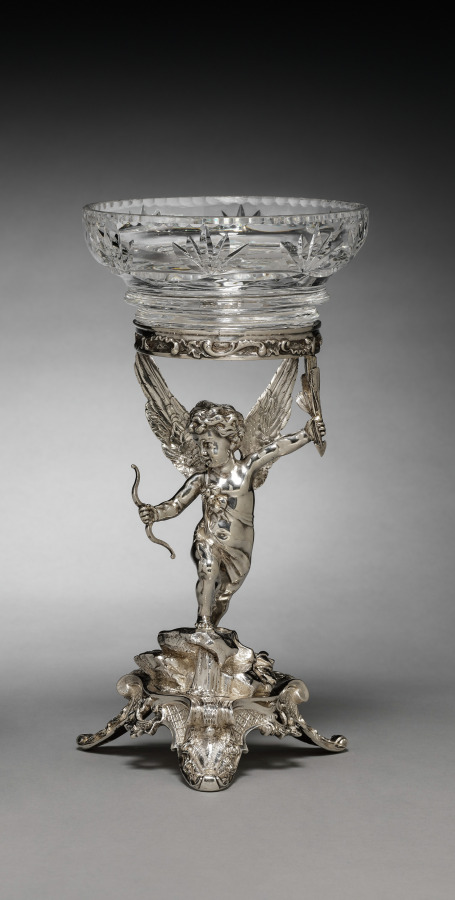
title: Compote and Stand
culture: Russian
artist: House of Fabergé (Russian, 1842–1918)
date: c. 1890–99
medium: silver, glass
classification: Silver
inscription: Inscribed “K. Fabergé” in Cyrillic, surmounted by the double-headed Imperial eagle.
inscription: “88” silver standard